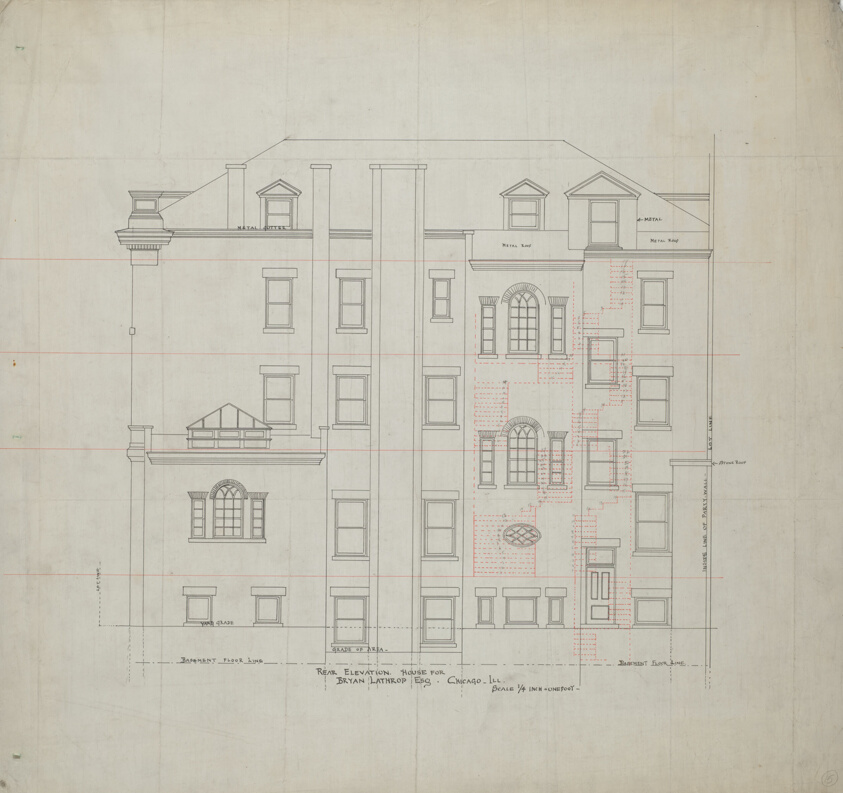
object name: Architectural Drawing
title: Bryan Lathrop House, Chicago, Illinois, Rear Elevation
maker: McKim, Mead and White; American, 1879-1919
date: c. 1892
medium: Graphite on linen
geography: Chicago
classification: working drawing; architectural drawing